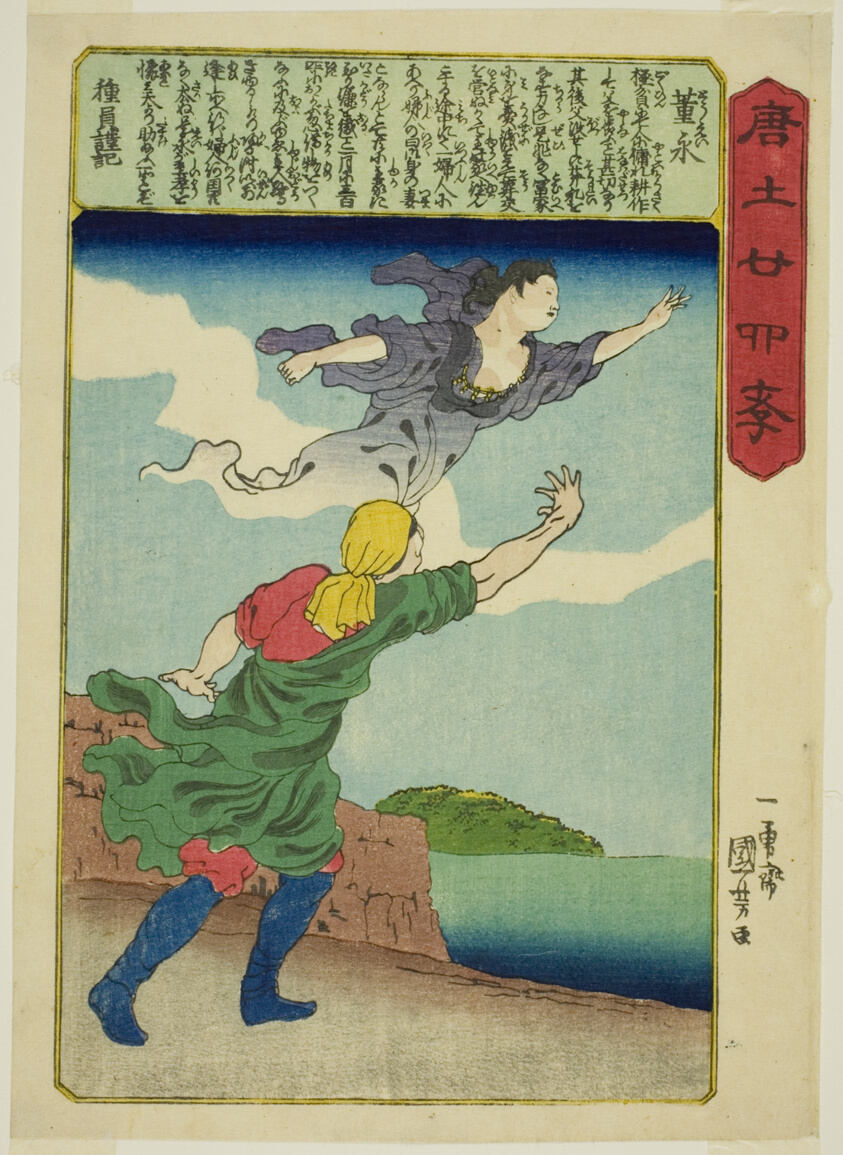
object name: Print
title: Dong Yong (To Ei), from the series "Twenty-four Paragons of Filial Piety in China (Morokoshi nijushiko)"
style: Japanese (culture or style)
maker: Utagawa Kuniyoshi (Japanese, 1797-1861)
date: c. 1848/50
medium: Color woodblock print; chuban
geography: Japan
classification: woodblock print; print; asian art